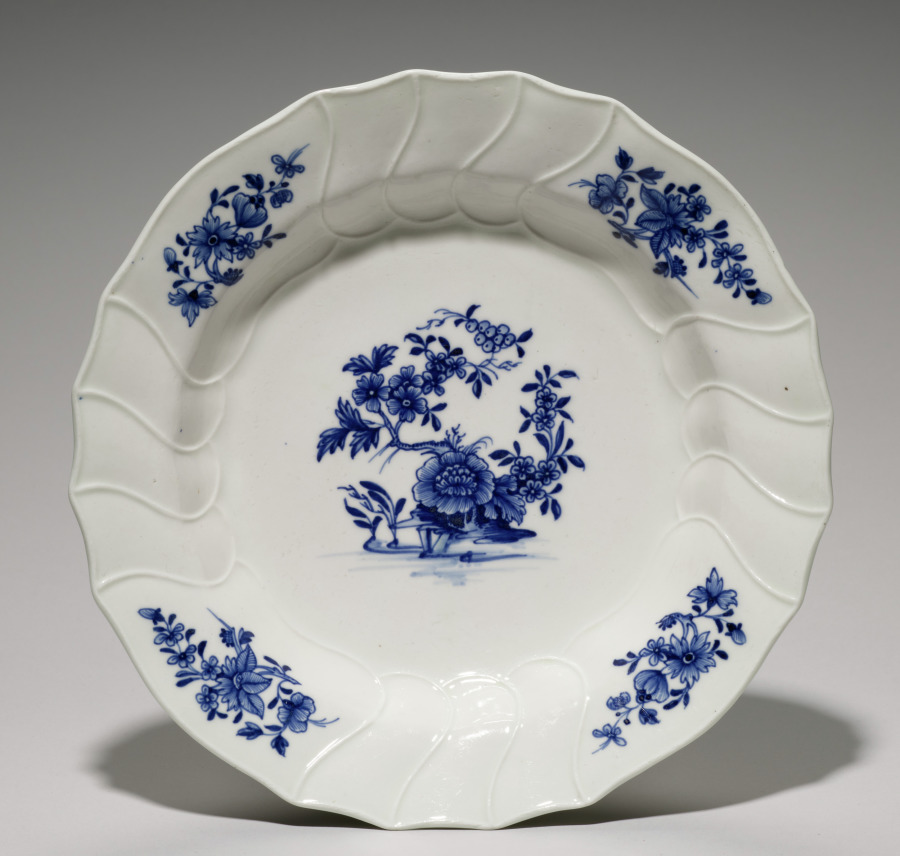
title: Plate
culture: Belgium/France, Tournay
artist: Tournay Factory (Belgian)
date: c. 1800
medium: porcelain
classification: Ceramic